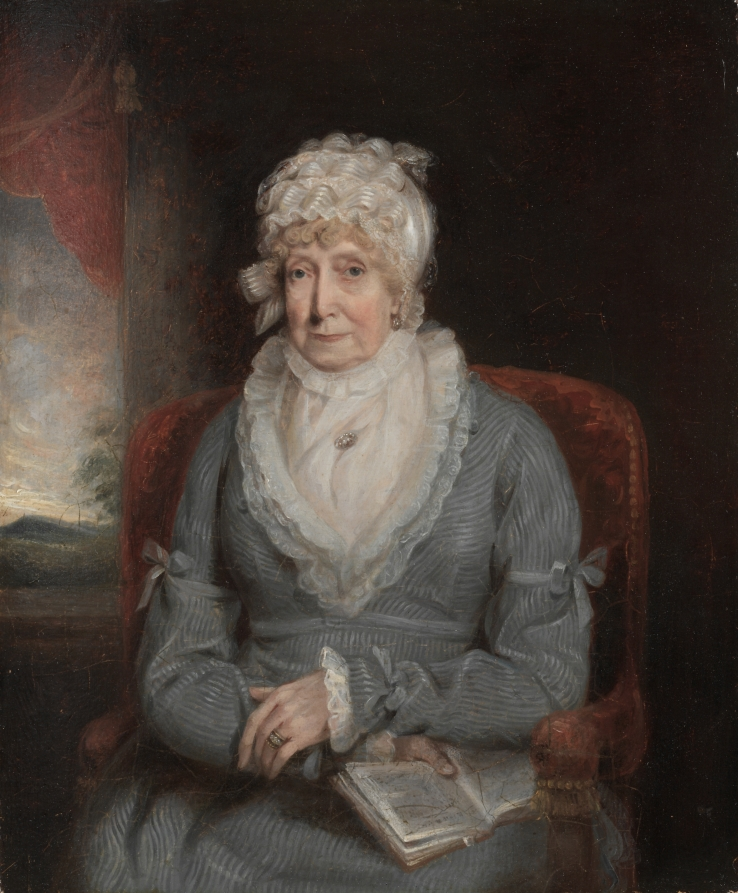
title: Portrait of a Woman (Mrs. Ann Hivlyn)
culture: America or England, 19th century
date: early 1800s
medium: oil on wood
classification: Painting